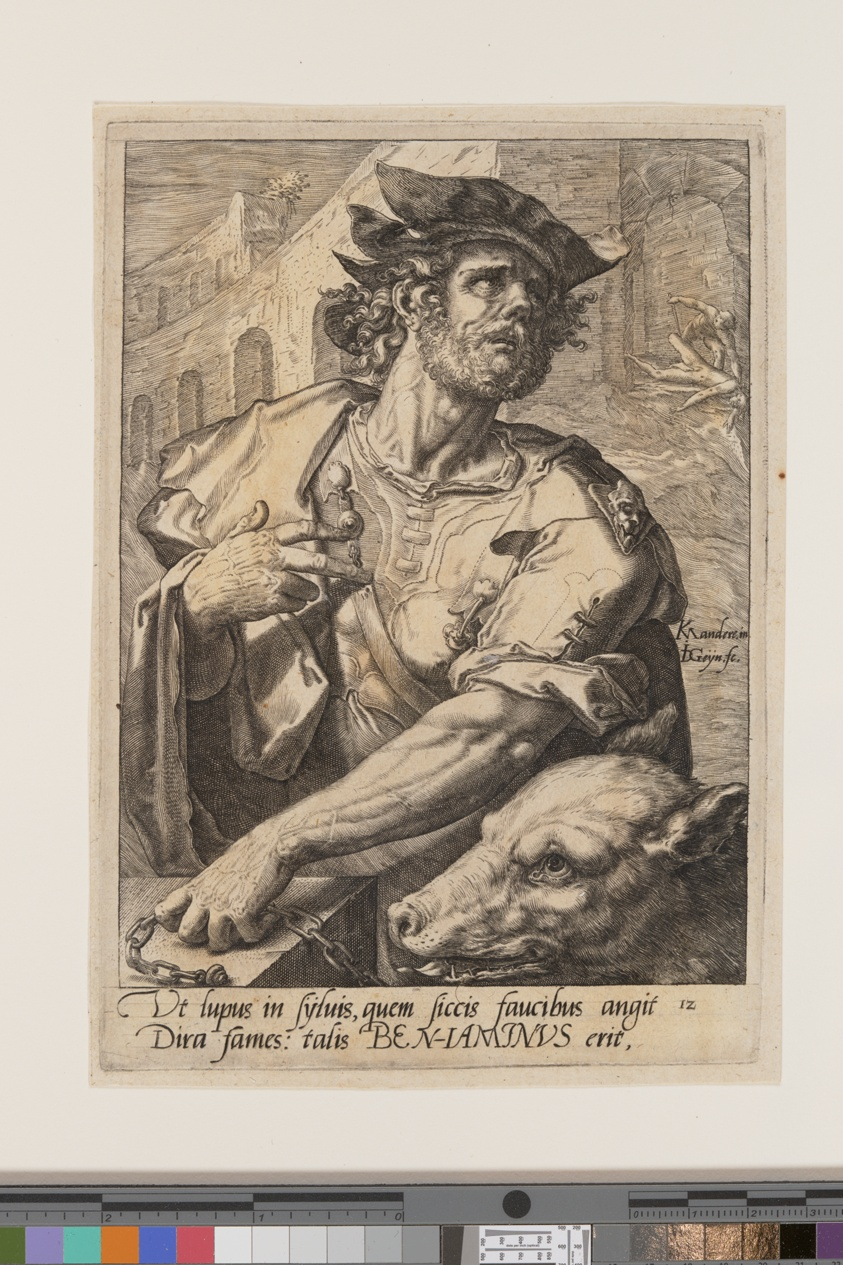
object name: Print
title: Benjamin, from The Twelve Sons of Jacob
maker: Jacques de Gheyn II (Dutch, 1565–1629); after Karel van Mander (Dutch, 1548–1606)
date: c. 1589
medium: Engraving on ivory laid paper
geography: Netherlands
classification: engraving; paper; print; prints and drawing